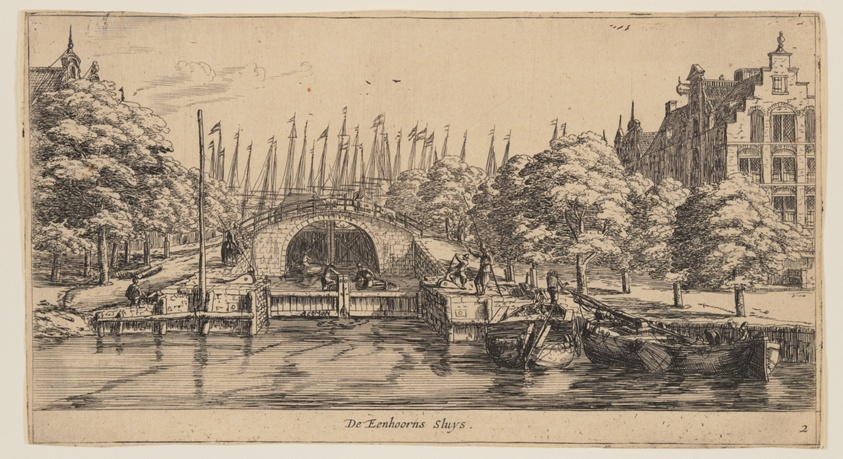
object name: Print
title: De Eenhorns Sluys, from Views of Amsterdam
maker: Reinier Nooms, called Zeeman (Dutch, c. 1623–1664)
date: c. 1660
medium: Etching on ivory laid paper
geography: Netherlands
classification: etching; paper; print; prints and drawing